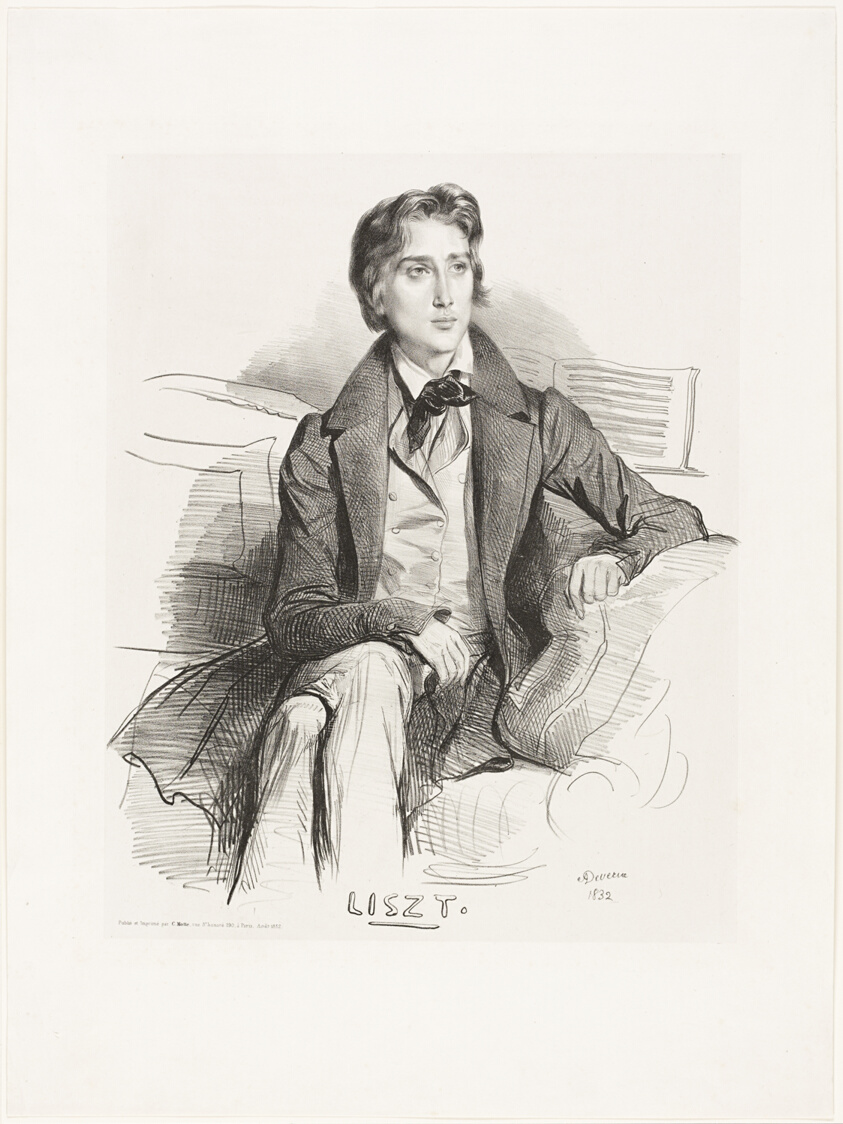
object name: Print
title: Portrait of Franz Liszt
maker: Achille Devéria (French, 1800-1857); published and printed by Charles Motte (French, 1785-1836)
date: published August 1832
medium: Lithograph on ivory China paper laid down with chine collé on white wove paper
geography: France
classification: lithograph; print; prints and drawing